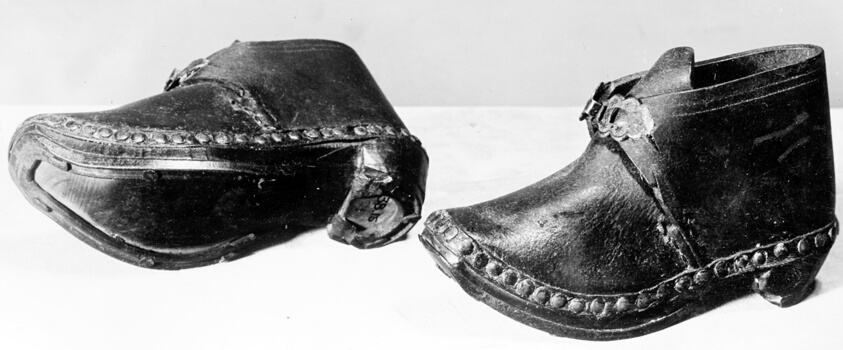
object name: Textile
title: Lancastershire Clogs (Children's Shoes)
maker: England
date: 1875/1900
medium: Leather and metal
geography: England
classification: textile; shoes - misc; costume accessory - shoe; costume; dress (garment); clothing